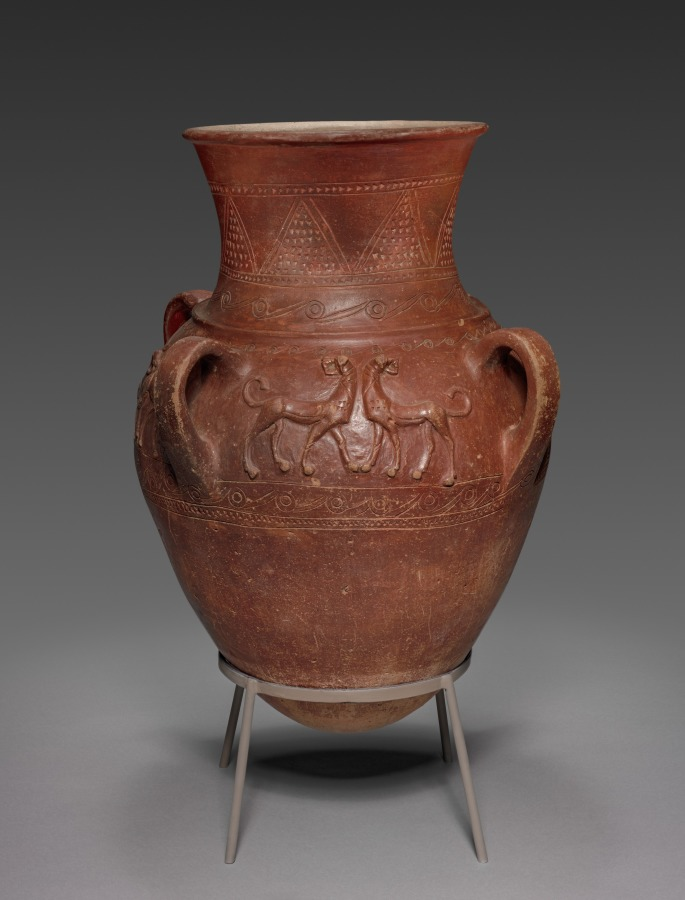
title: Hittite Vessel with Four Scenes Molded and Carved in Relief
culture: Eastern Turkey, Hittite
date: 1400–1200 BCE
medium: burnished earthenware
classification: Ceramic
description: The Hittites were a powerful people who vied with the Egyptians for control of the Near East. At times, however, alliances in the form of royal marriages were forged between the two rivals. The scene on the front of this vase shows a seated god or king holding a drinking vase in the form of a stag. Near him is a large-handled vessel in a ring stand, which illustrates how large jars such as this one were used. The standing figure is a priest pouring a liquid offering. The scene on the back of this vase shows a bow hunter using a doe with a tether as a decoy to attract a stag. Some of the hunter's arrows have already pierced the stag's hide.